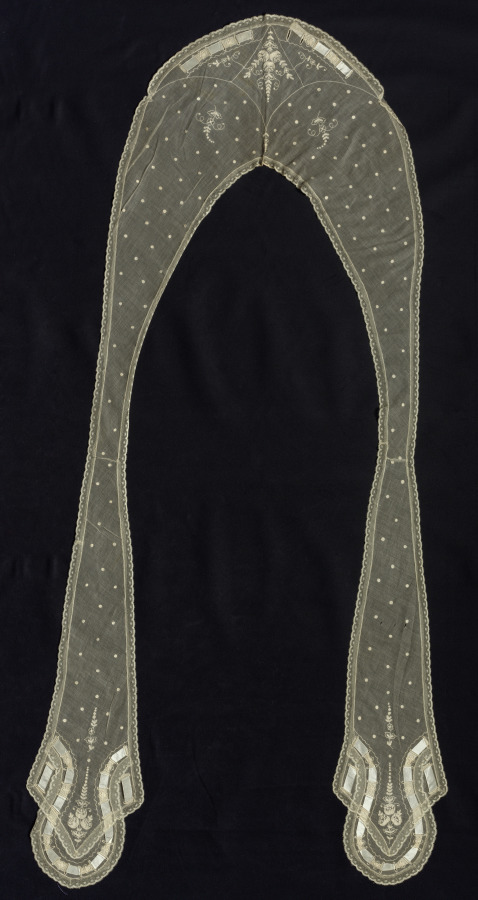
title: Lace Collar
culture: America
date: 1840–60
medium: Bobbin lace edging and embroidery on machine-made cotton net, silk ribbons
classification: Lace